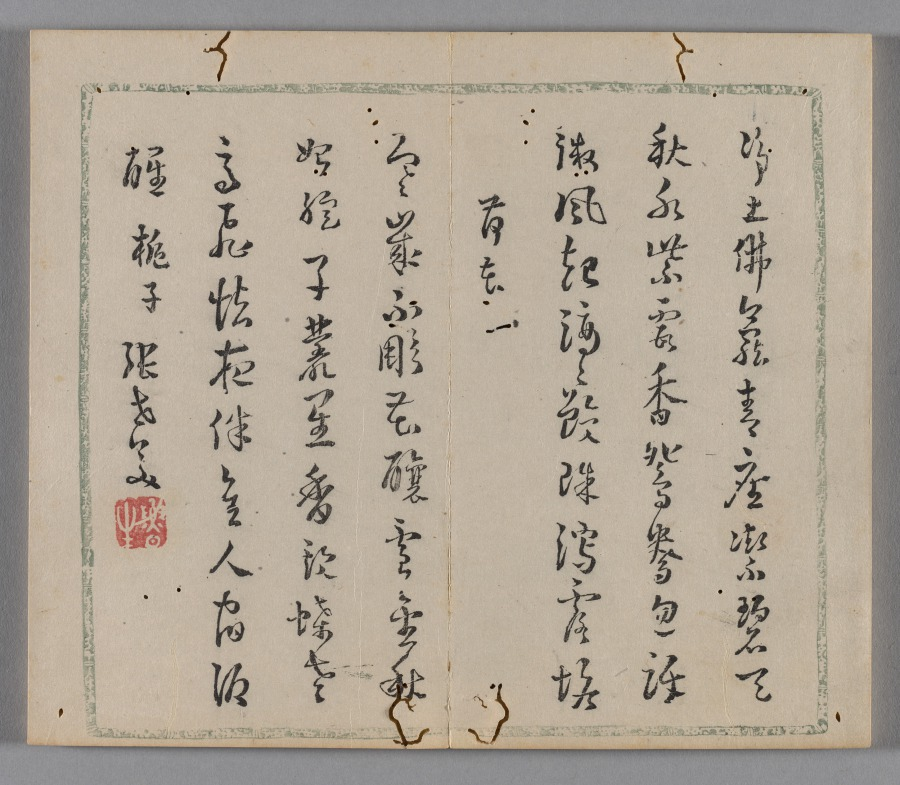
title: Ten Bamboo Studio Collection of Calligraphy and Painting: Round Fans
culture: China, Qing dynasty (1644-1911)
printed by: Hu Zhengyan (Chinese, c. 1584–1674)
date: 1633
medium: Woodblock-printed book; ink and colors on paper; first edition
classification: Print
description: Color printing reached a level of perfection in the early 1600s, as seen in this Ten Bamboo Studio Collection of Calligraphy and Painting and the Mustard Seed Garden Manual of Painting (printed 1679 and 1701). The painterly quality, precision in registering (aligning) the woodblocks, and harmonious colors made them the most successful color print editions in Chinese history. Both editions were printed and compiled in Nanjing, spread nationwide, and had a great impact on the arts in Japan and Korea.